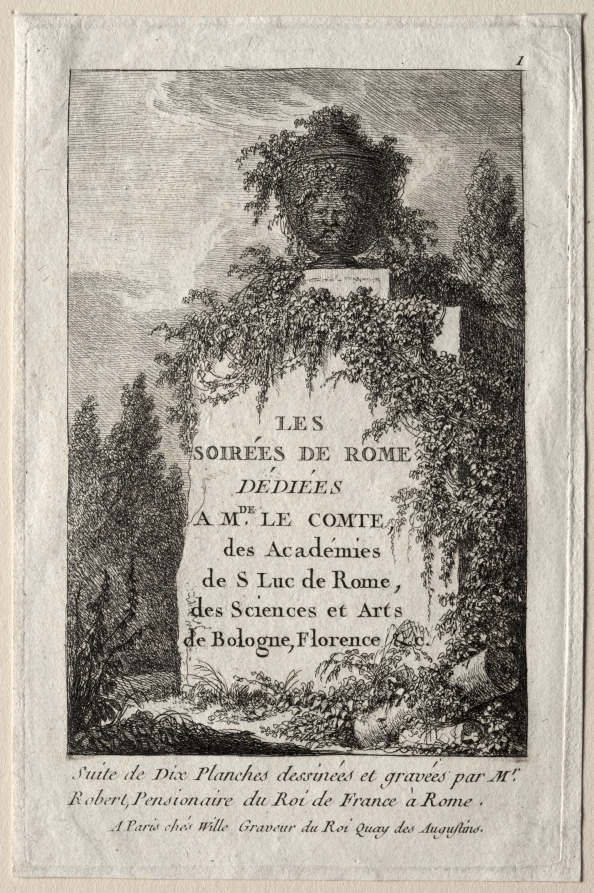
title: Title Page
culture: France, 18th century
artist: Hubert Robert (French, 1733–1808)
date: 1763–64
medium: etching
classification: Print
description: Derived from his own pen-and-ink drawings, this suite of etchings features fictional characters situated near recognizable buildings and statues in Rome. On the title page, Robert dedicated the suite to Marguerite Le Compte, who visited Rome in 1764 in the company of the wealthy author and art enthusiast Claude Henri Watelet. Both Le Compte and Watelet were amateur etchers, and they socialized with a group that included artists and printmakers centered at the academies in Italy. Robert’s dedication was likely motivated by the hope of future patronage from Le Compte. She may be the generous woman with a hand muff depicted in The Ancient Temple, the fifth scene in this series.